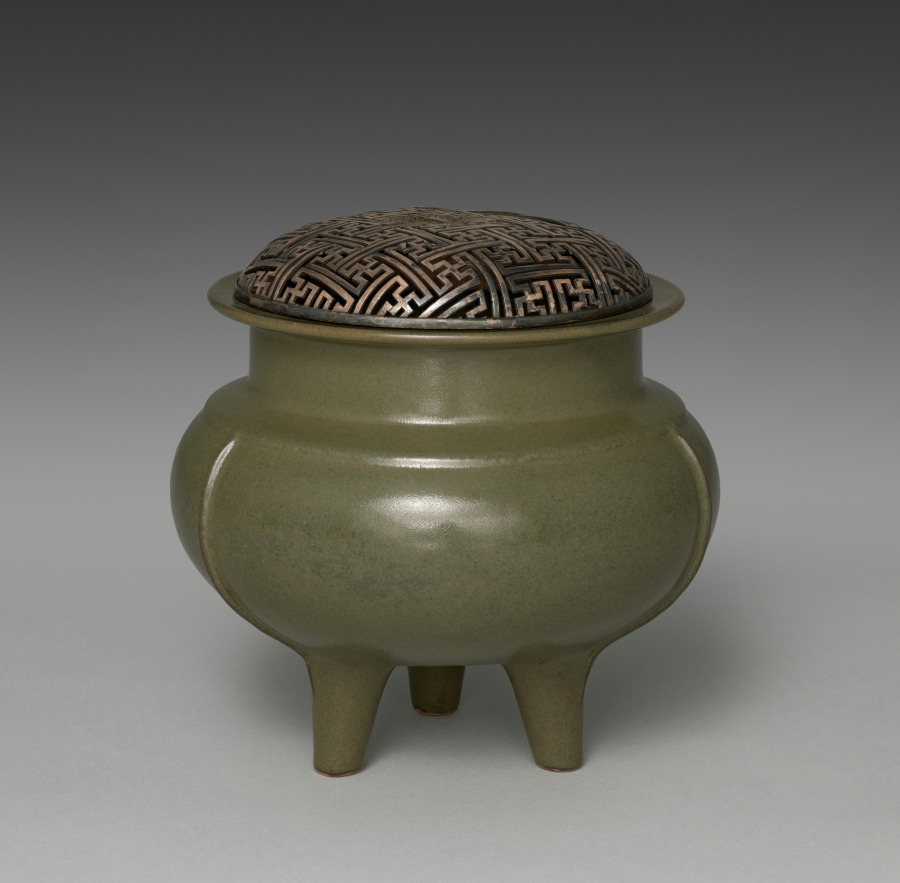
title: Incense Burner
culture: Japan, Meiji period (1868–1912)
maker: Seifū Yohei III (Japanese, 1851–1914)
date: 1895–1914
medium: Porcelain with tea-leaf colored glaze and molded design and geometric openwork silver lid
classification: Ceramic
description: Kyoto-based Japanese ceramist Seifū Yohei III (1851–1914) admired the glaze colors found on Chinese porcelain and tried to replicate them through intensive experimentation. His green and creamy white glazes were particularly well received. The combinations of colors with subtle molded and incised decorations in his ceramics respond powerfully to changes in light, creating a dynamic viewing experience. Names for the glazes, written in ink with a brush on the lids of the custom-made storage boxes for the works, often indicate a specific glaze or ware that had inspired him, even when the resulting color was distinctively his own.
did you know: This incense burner with a geometric-patterned silver lid has a glaze identified on its box lid as “tea leaf [color–glazed] porcelain” (chayōji).